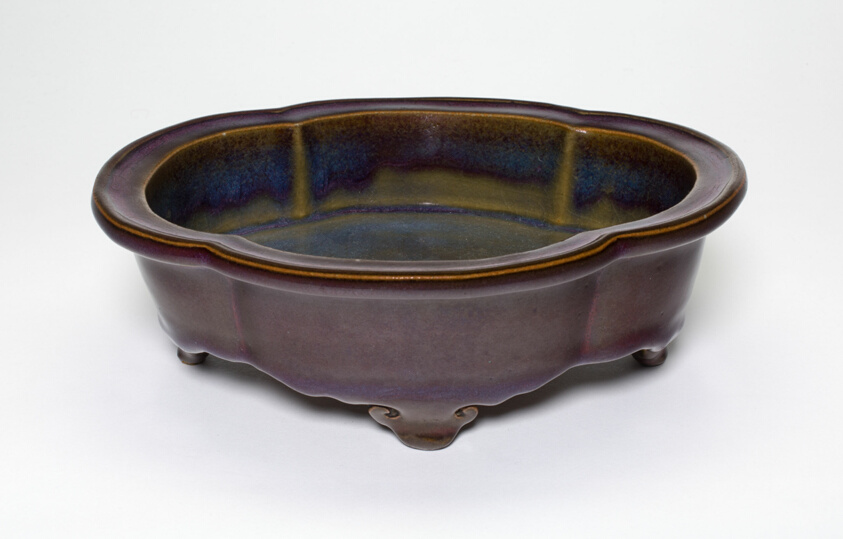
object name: Decorative Arts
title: Lobed Basin for Flowerpot with Four Cloud-Shaped Feet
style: Chinese (culture or style)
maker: China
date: Yuan (1271–1368)/Ming dynasty (1368–1644), 14th century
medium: Jun ware; stoneware with reddish-blue and purple glaze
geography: China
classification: stoneware; asian art; ceramics; decorative arts